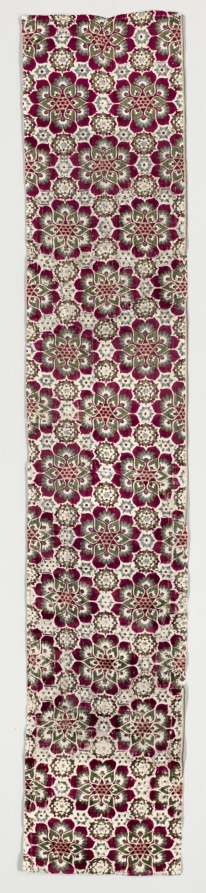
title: Four-color Velvet with Medici Armorial in Rosettes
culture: Italy, Florence, 15th century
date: 1450–1500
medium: silk, velvet: cut pile and voided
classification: Velvet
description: This polychrome velvet displays the heraldic design of the Medici family of Florence, where it was probably made. The device of crimson balls on a yellow ground appears in the centers of the colorful rosettes. Gilt-metal thread forms the heraldic ground in more lavish examples. The striped selvage helps identify the late 15th-century dating. The rosette pattern created with four colors of pile warp is silhouetted on the ivory satin weave foundation, known as voided velvet. Its color scheme and tile-like design have often been associated with influence from Islamic lands, most likely Turkey.